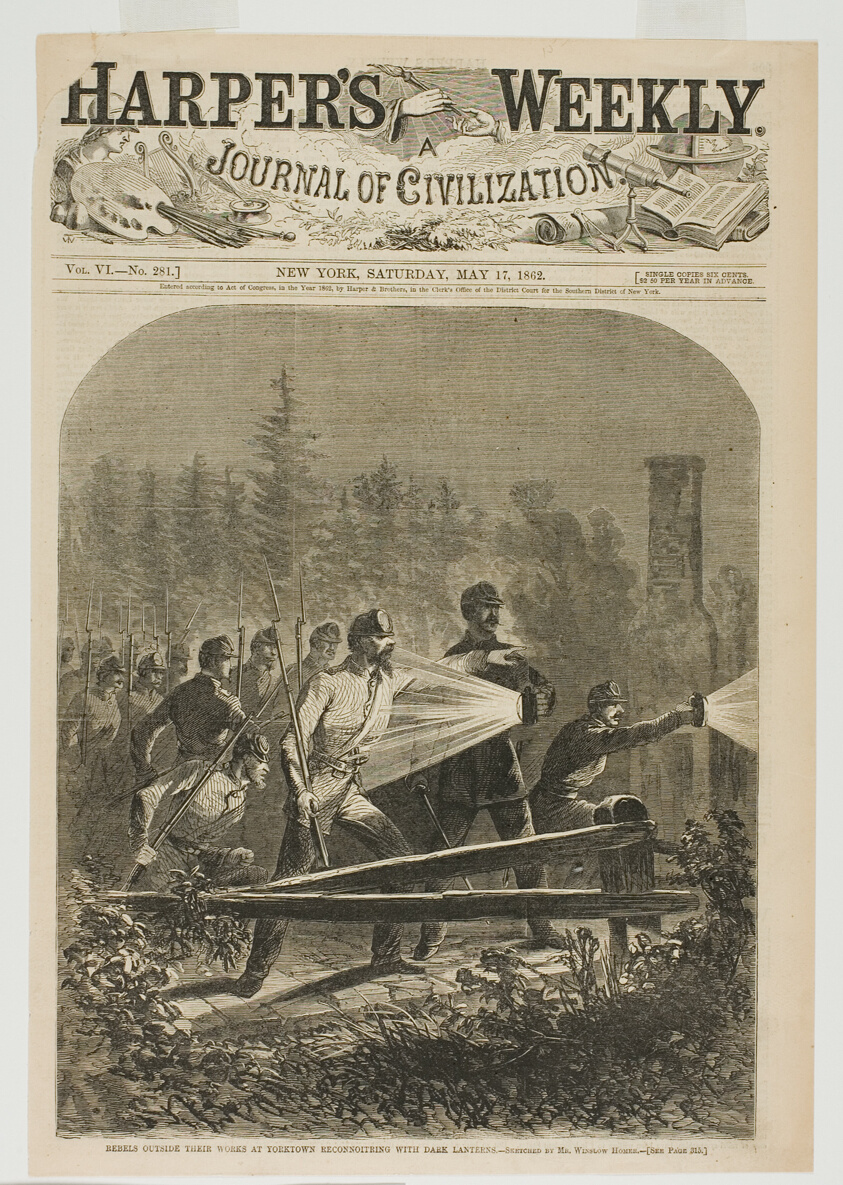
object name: Print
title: Rebels Outside Their Works at Yorktown, Reconnoitring [sic] with Dark Lanterns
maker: Winslow Homer (American, 1836-1910); published by Harper's Weekly (American, 1857-1916)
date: published May 17, 1862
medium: Wood engraving on paper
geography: United States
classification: wood engraving; print; prints and drawing